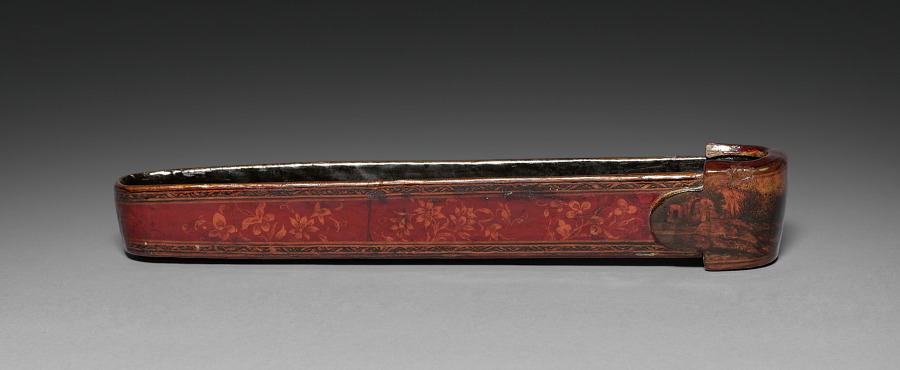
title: Pen and Ink Box (base)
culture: Iran, probably Isfahan, Safavid period (1501–1722)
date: 1667–98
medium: Varnished lacquer and opaque watercolor over papier-mâché, ink, and copper alloy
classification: Lacquer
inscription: 1109